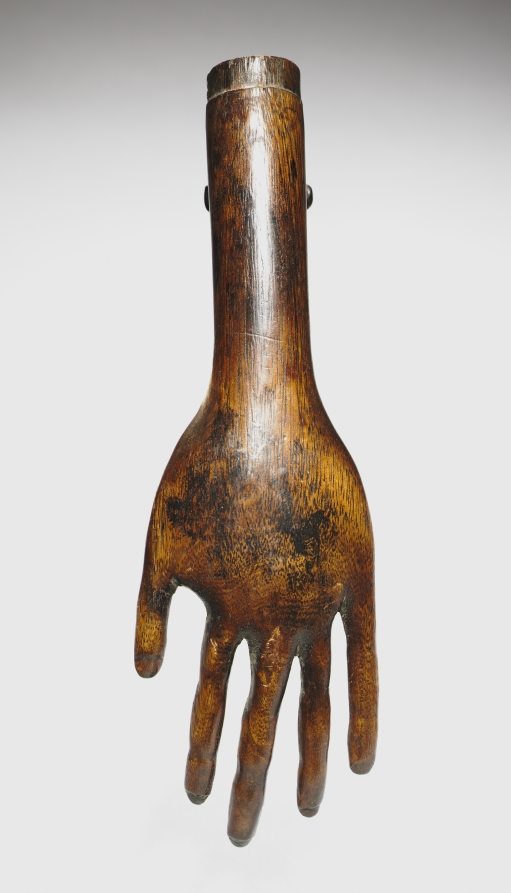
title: Pipe bowl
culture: Africa, Central Africa, Democratic Republic of Congo, Luluwa or Luntu maker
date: early to mid-1900s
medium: Wood, iron, and copper alloy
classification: Implements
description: Tobacco smoking had important social connotations in Central Africa, denoting age, status, and gender. Perhaps the enlarged hand expressed physical and spiritual powers and indicates that this work belonged to a chief. Figuratively carved pipes and snuff mortars constitute important genres of Luluwa decorative arts. As personal objects reflecting the prominence and success of their male and sometimes female owners, they are usually the creative work of virtuoso artists and take a variety of often imaginative shapes.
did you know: The cavity for the tobacco is positioned in the belly of a figure who holds himself up with bent arms on the pipe.